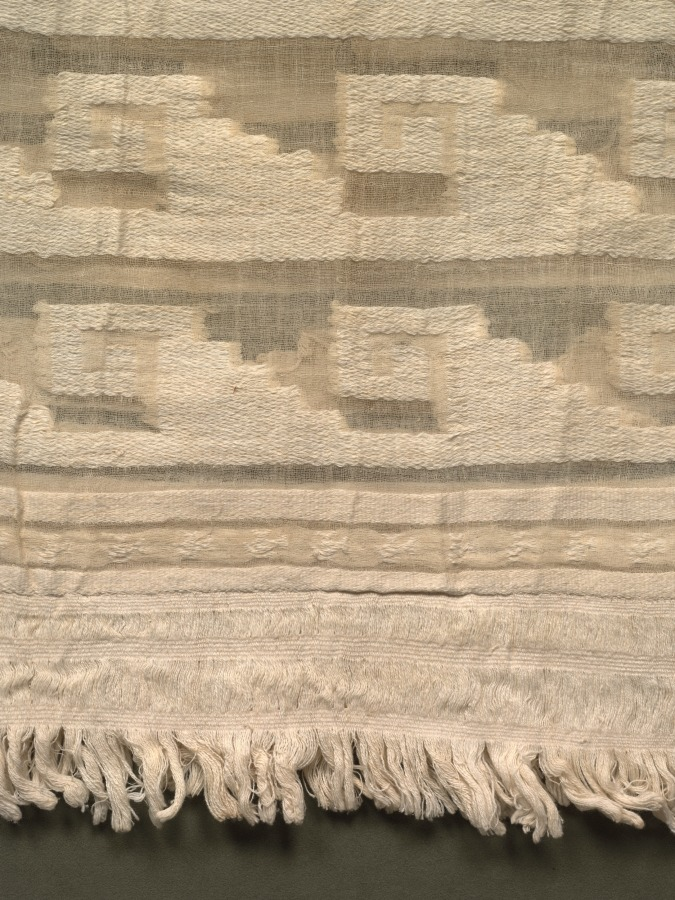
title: Tunic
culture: Peru, Chimú or Chimú-Inka, 12th-16th century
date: 1100–1532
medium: white cotton; plain weave with supplementary weft brocading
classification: Textile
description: This garment embodies an important principle of the Chimú textile aesthetic: a love of combining different textures, some dense and sculptural and others so open and airy they are nearly invisible. (The hand-spun yarns are only .1 to .2 millimeters in diameter.) It also elegantly articulates the simplified, spare visual vocabulary that the Chimú favored, here geometric motifs.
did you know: The Chimú forged an empire that thrived until the 1460s, when the Inka incorporated it into their own imperial domain.